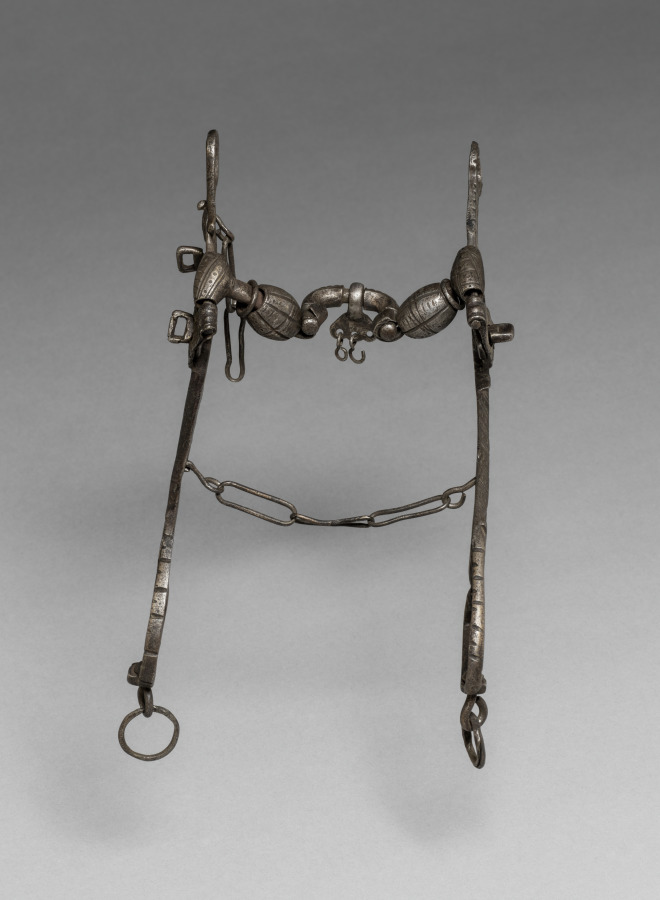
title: Curb Bit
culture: Germany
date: c. 1535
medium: steel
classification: Arms and Armor